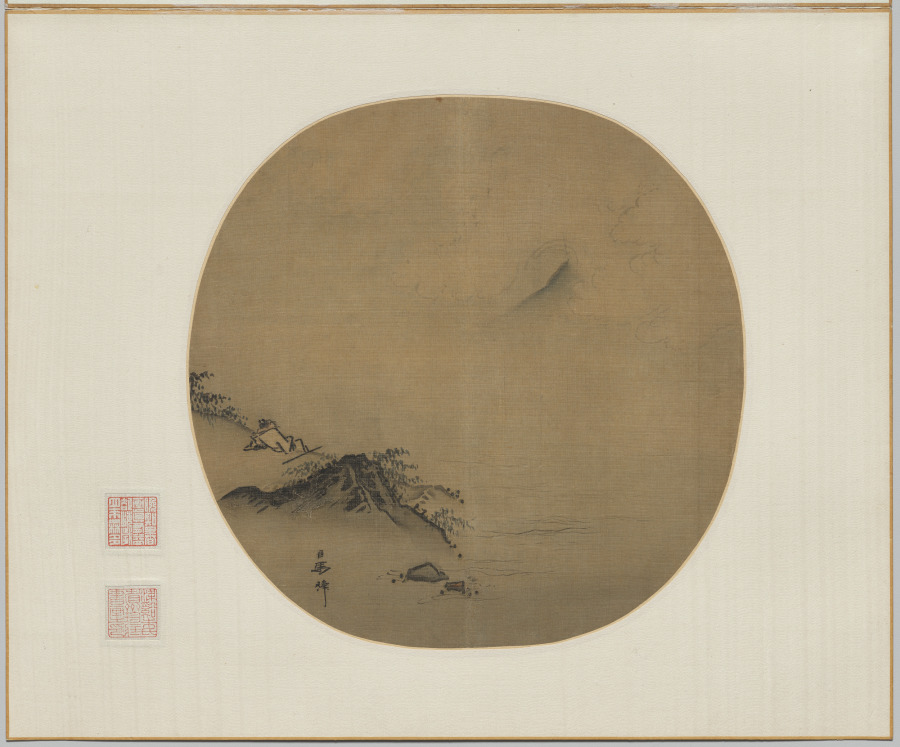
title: Scholar Reclining and Watching Rising Clouds, Poem by Wang Wei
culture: China, Southern Song dynasty (1127-1279)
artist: Ma Lin (Chinese, c. 1185–after 1260)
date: c. 1256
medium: Album leaf; ink on silk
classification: Painting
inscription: 臣馬麟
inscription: 2 seals on mounting of Chu Sheng-chai (20th c.).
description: Poem and painting, once mounted together as one fan, exemplify the collaboration between imperial patron and court painter. Emperor Lizong’s calligraphy cites a verse from Wang Wei’s (701–761) poem, Walking to where the water ends, I sit and watch when clouds arise. Ma Lin’s response is this painting. At the water’s edge, a scholar reclines by a large rock. The view leads across the empty middle ground to a distant mountain. With sparse ink and subtly graded washes, Ma Lin visualizes the poetic verse. The painting suggests the impact of Chan aesthetics through interaction between the palace, literati-officials, and monasteries around Hangzhou.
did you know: Ma Lin was the son of Ma Yuan, the artist renowned for his unique composition and often referred to as "One-corner Ma."